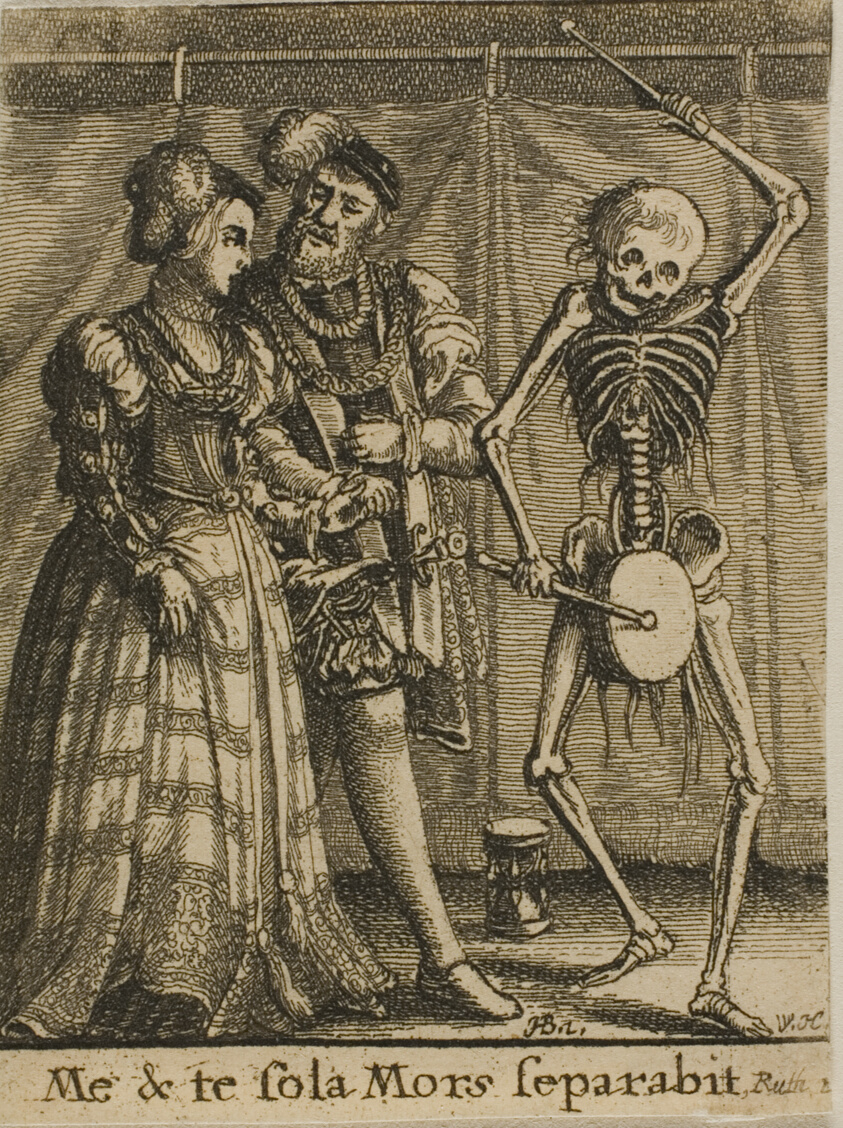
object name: Print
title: The Bridal Pair and Death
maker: Wenceslaus Hollar (Bohemian, 1607-1677); after Hans Holbein the younger (German, c.1497-1543)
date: 1651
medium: Etching on ivory wove paper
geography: Bohemia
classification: etching; print; prints and drawing